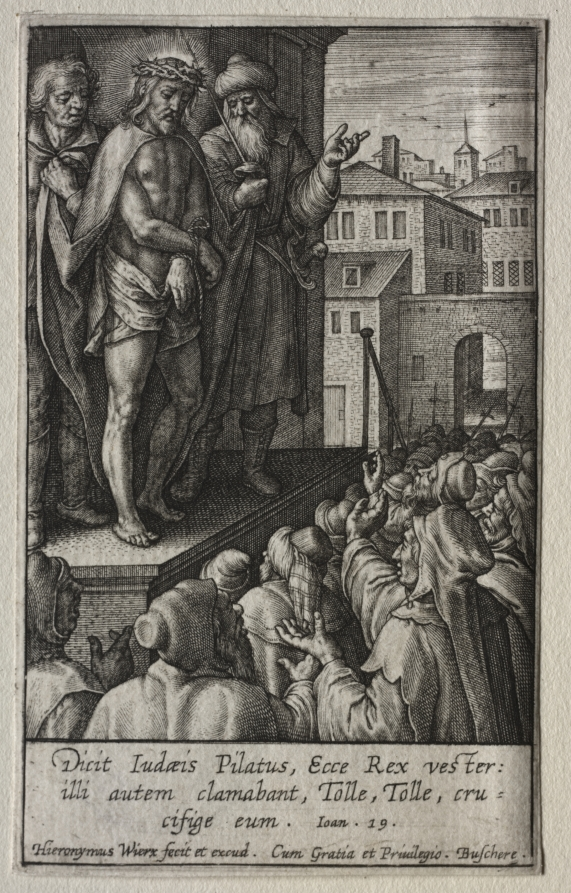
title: The Passion: Ecce Homo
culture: Flanders, late 16th-early 17th century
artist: Hieronymus Wierix (Flemish, 1553–1619)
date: before 1619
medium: engraving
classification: Print